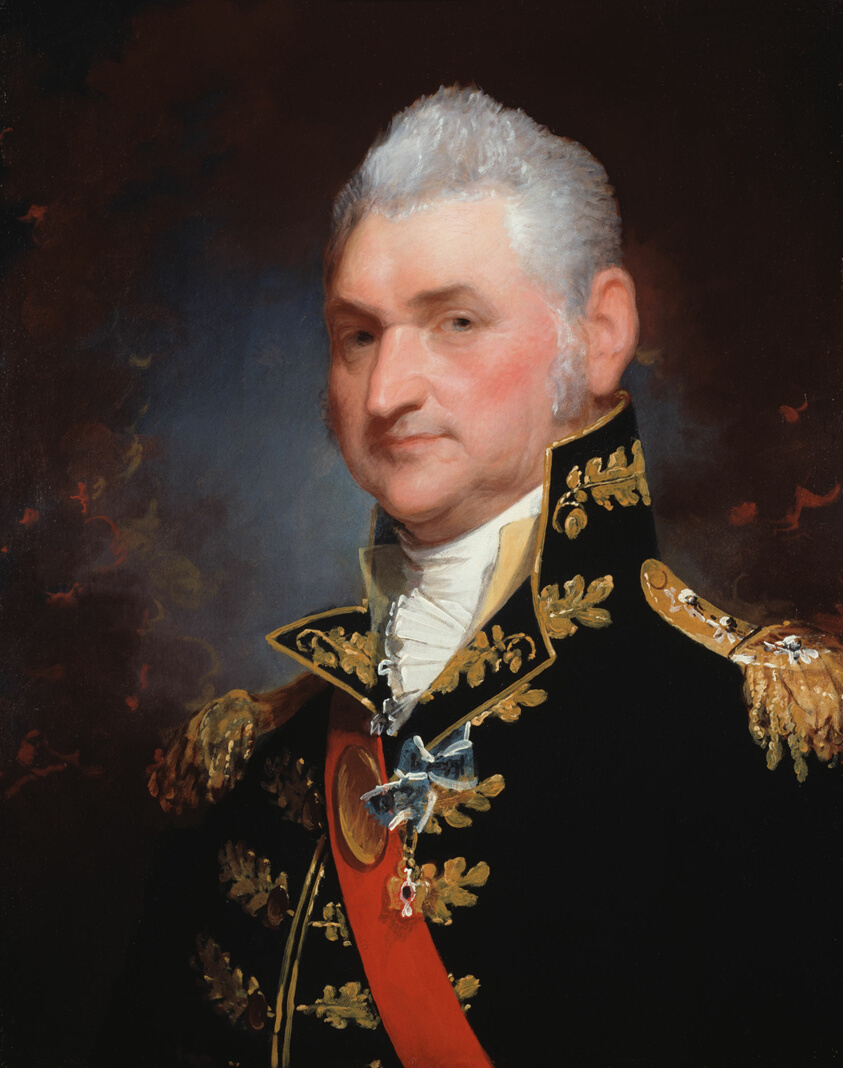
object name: Painting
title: Major-General Henry Dearborn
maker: Gilbert Stuart (American, 1755–1828)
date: 1812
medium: Oil on mahogany panel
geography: Roxbury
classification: painting; american arts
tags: fashion, Century of Progress, world's fairs, Chicago World's Fairs, Chicago, people, portraits